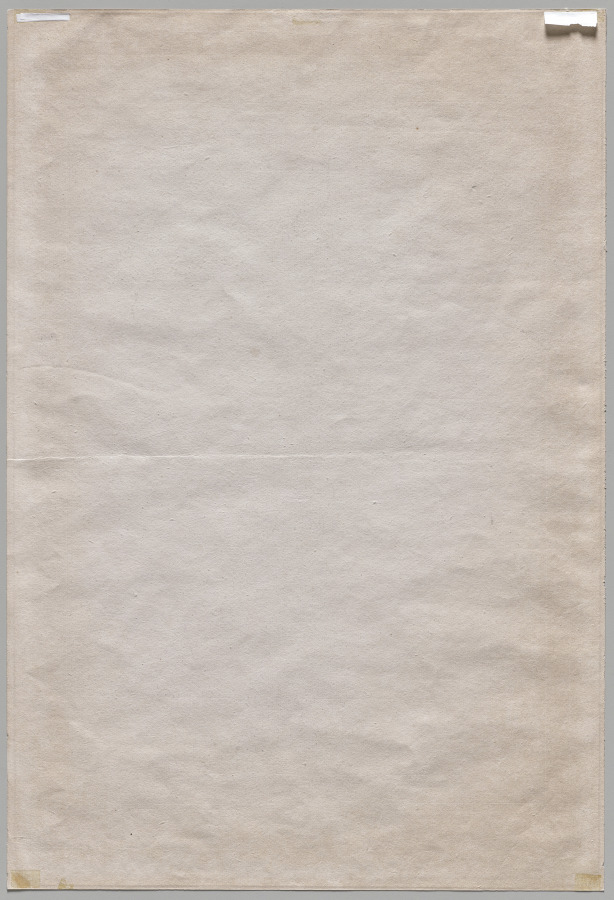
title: Evening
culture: Germany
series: Times of Day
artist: Philipp Otto Runge (German, 1777–1810)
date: 1803–5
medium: etching on heavy wove paper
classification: Print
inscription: Written in pencil on mat: "Abend"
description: Phillip Otto Runge’s large-scale, four-part print series, Tageszeiten (Times of Day), is a landmark of German Romantic printmaking, capturing the “new art” promoted by Runge and his contemporary, Caspar David Friedrich, one rooted in a more personal and spiritual response to nature. Runge presents allegories of nature as a means to understand God and the sublime on earth. His four-part series represents not only the four times of day but also the seasons and the stages of human life, while contrasting eternal time with human time through various literary and religious references. Viewing the series from Morning to Night, seedlings emerge from the earth, bloom, decay, and die. Young spirits or children are born, mature, and grow old, eventually entering a sleep reminiscent of death. A female figure appearing in two scenes, possibly Mother Nature, inspires abundance and then embraces its decline, suggesting nature’s continuity despite human mortality. In each plate, Runge contrasts eternal time with human time, or spirituality with physicality, by contrasting the iconography in the borders with that in the centers.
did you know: After receiving a set of Times of Day as a gift from the artist, the German author Johann Wolfgang von Goethe (1749–1832) apparently exclaimed, “it’s enough to drive you crazy—beautiful, and mad at the same time!”